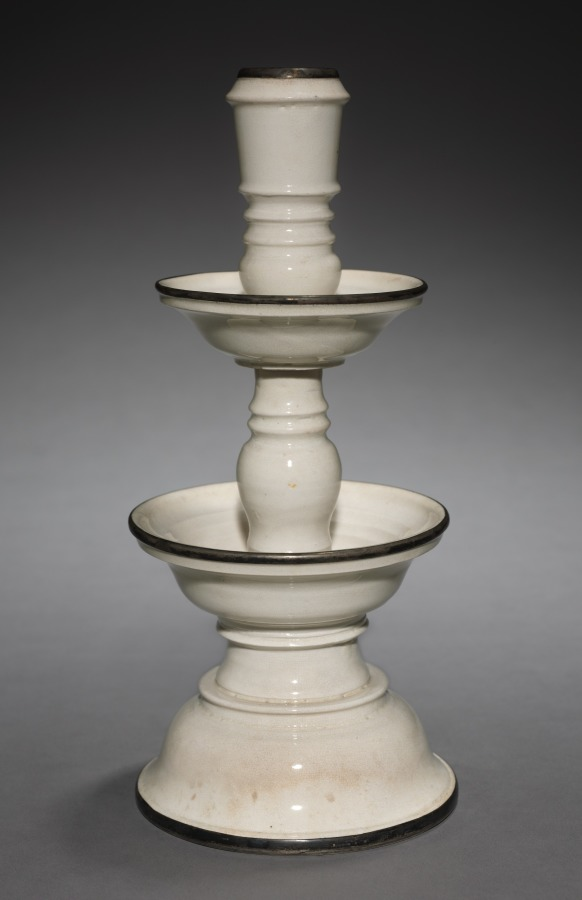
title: Candlestick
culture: China, Ming dynasty (1368–1644)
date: 1600s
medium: glazed porcelain with metal rims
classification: Ceramic